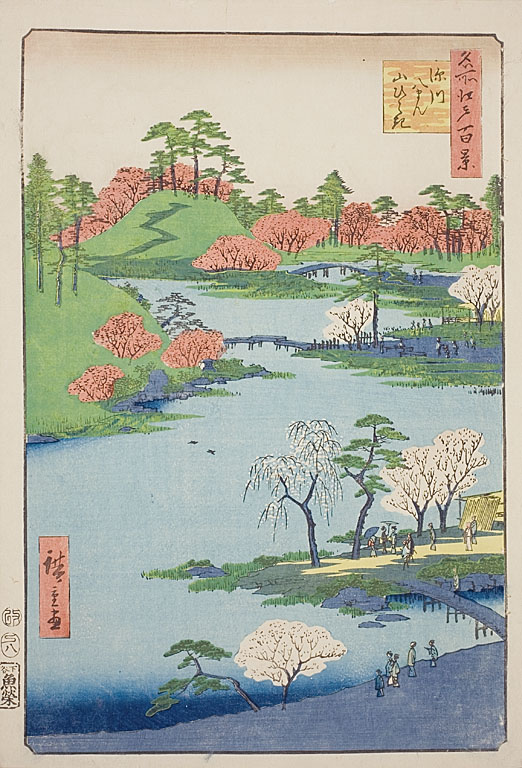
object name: Print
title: Opening of the Garden at Fukagawa Hachiman Shrine (Fukagawa Hachiman yamabiraki), No.68 from the series “One Hundred Famous Views of Edo (Meisho Edo hyakkei)”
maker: Utagawa Hiroshige (Japanese, 1797-1858)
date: 1857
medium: Color woodblock print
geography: Japan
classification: woodblock print; print; asian art